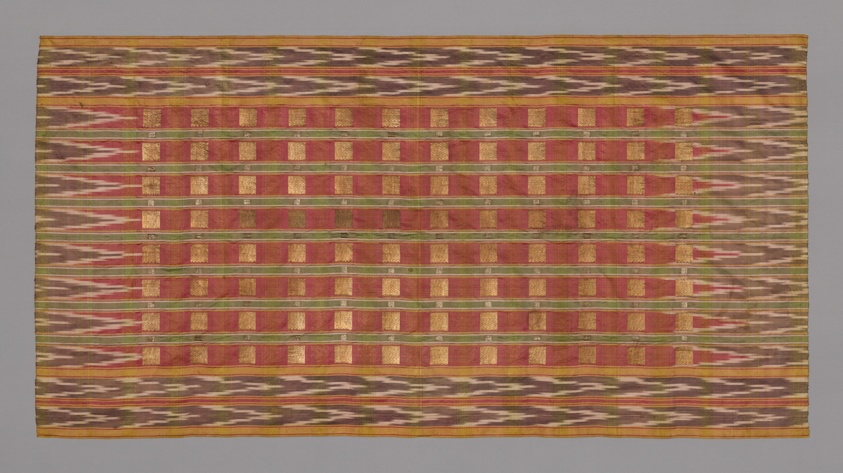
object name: Textile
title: Panel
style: Japanism, meiji, late edo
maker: Japan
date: late Edo period (1789–1868)/ Meiji period (1868–1912), 19th century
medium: Sari, ikat technique in purple, white, green yellow and red with gold and silver square design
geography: Japan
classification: textile; weaving